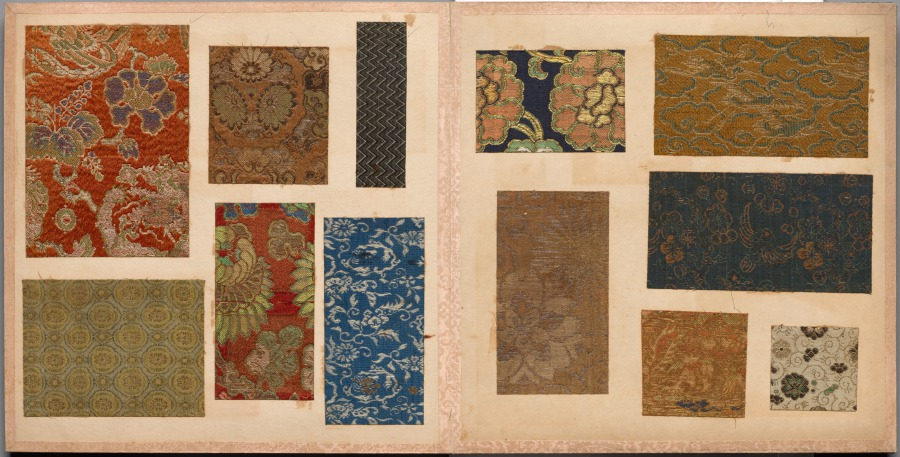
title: Album of Textile Samples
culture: Japan and China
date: 1700s–1800s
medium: silk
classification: Textile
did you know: This album has 26 pages containing 128 mounted Chinese or Japanese textile samples.